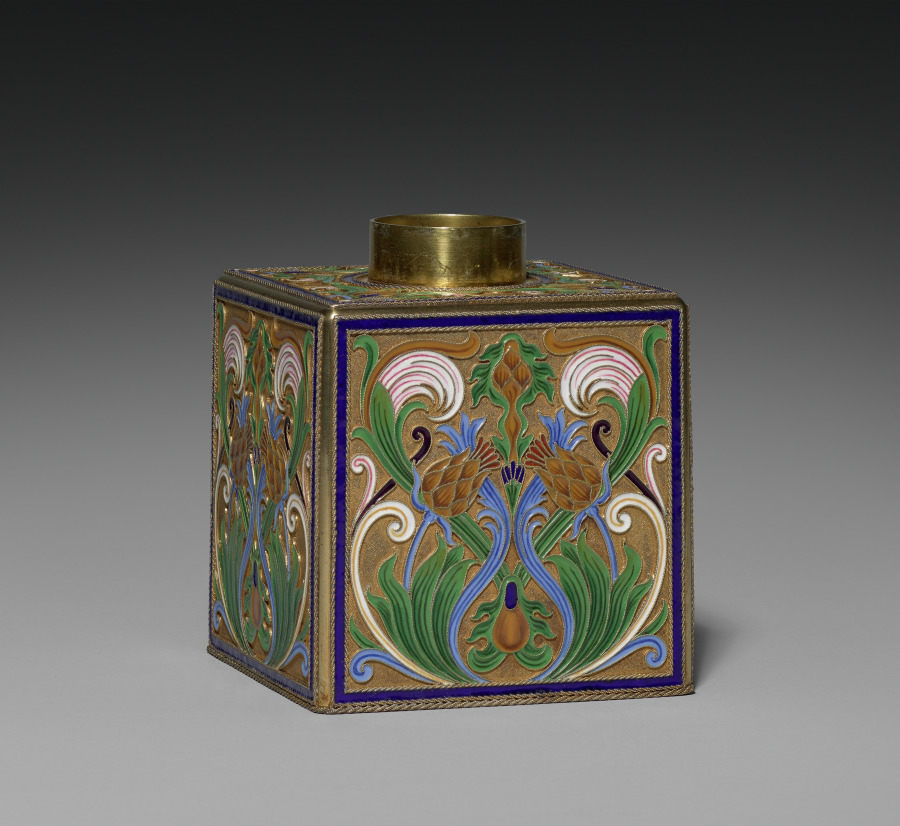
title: Tea Caddy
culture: Russia, St. Petersburg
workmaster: attributed to Feodor Ivanovich Rückert (Russian, 1840–1917)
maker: House of Fabergé (Russian, 1842–1918)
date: 1896–1906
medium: silver gilt, opaque cloisonné enamel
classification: Miscellaneous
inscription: 88, Kokoshnik, tester's initials [assay mark for Moscow, 1899-1908]; C. Fabergé (in Cyrillic); double-headed eagle [imperial warrant]; 88.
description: Fabergé’s craftsmen in Moscow, especially under the watchful eye of workmaster Feodor Rückert, became known for their work in the pan-Slavic or neo-Russian style, hearkening back to 17th-century motifs of Russian folk art. Often on rather conventional shapes, Rückert and his silversmiths created an explosion of color, achieved through the historic technique of cloisonné enamel in which tiny metal lines are soldered to the surface then filled with glass powders in various colors and fired to create a high gloss finish. The result is a spectacular evocation of the 17th-century originals. Far from mere copies, however, Rückert's designs, such as this tea service, employ naturalistic or abstract motifs in a thoroughly modern adaptation of a remarkable earlier period of Russian art and decoration.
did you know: This tea caddy is part of a larger tea service.